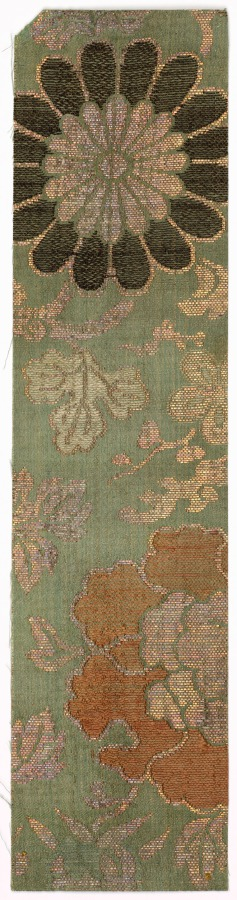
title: Textile Fragment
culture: Japan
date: 1800s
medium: silk, metallic thread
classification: Textile